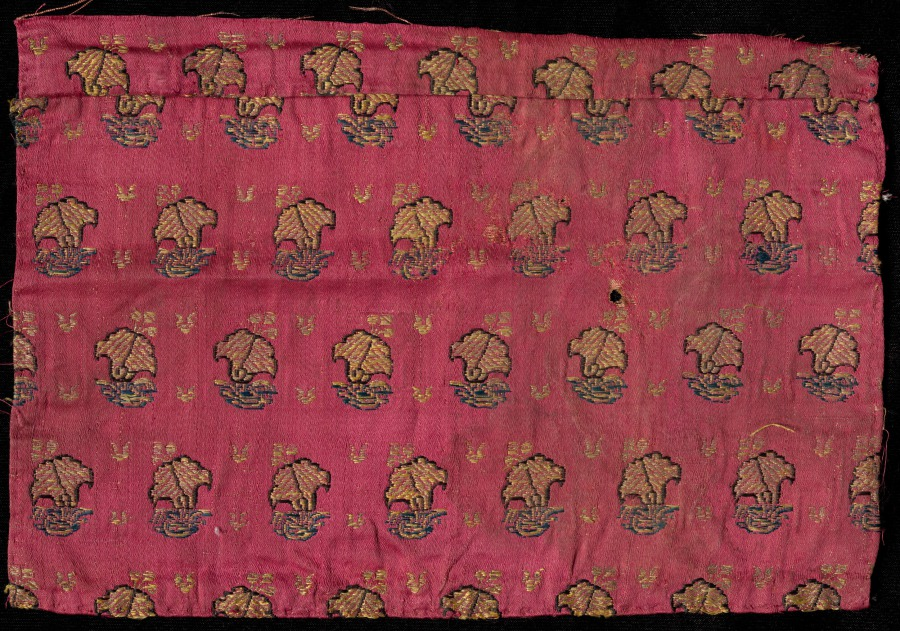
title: Brocade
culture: India, Gulbarga, 19th century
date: 1800s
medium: brocade, "himru"; silk and cotton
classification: Textile